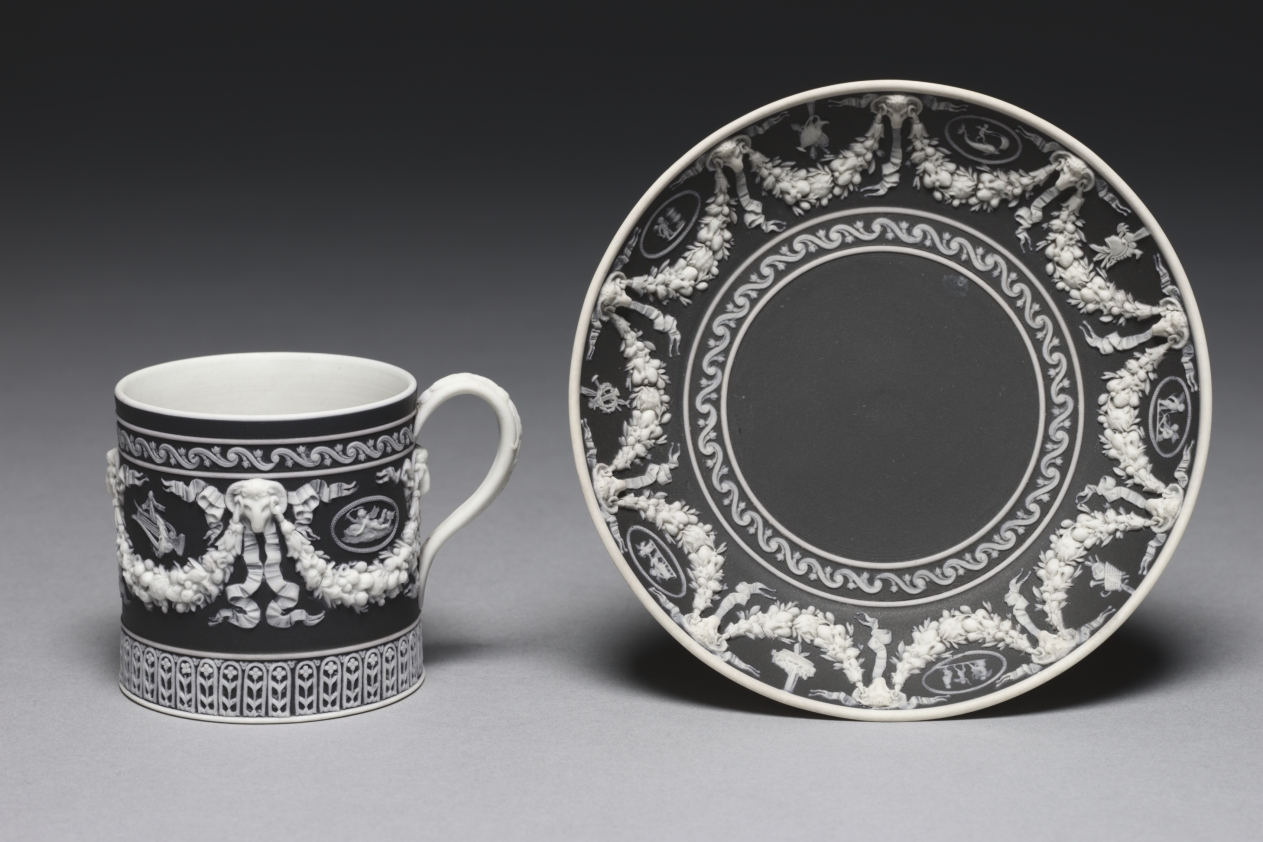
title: Cup and Saucer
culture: England, Staffordshire, 18th century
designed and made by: Wedgwood Factory (British)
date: c. 1790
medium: jasper ware with relief decoration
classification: Ceramic